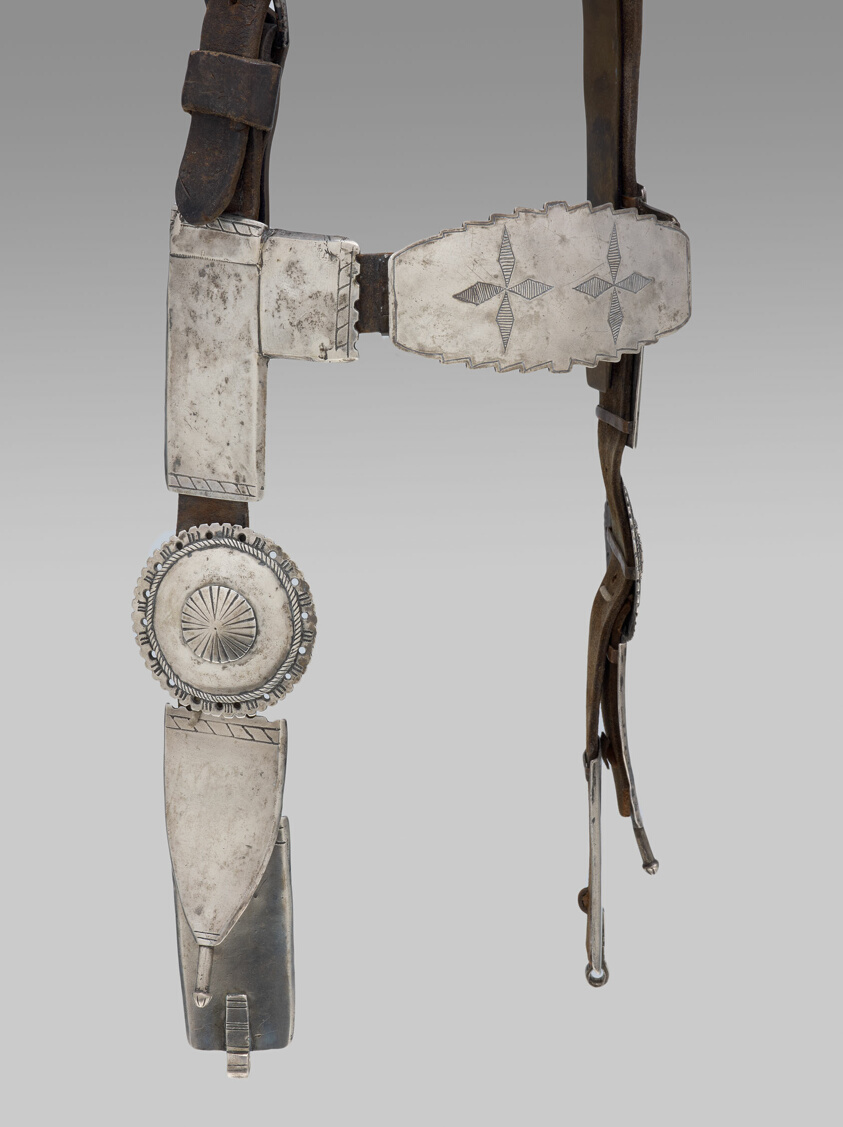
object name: Costume and Accessories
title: Horse Headstall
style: navajo, dine, americas, native american, native north american, Arts of the Americas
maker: Navajo (Diné) (Northern New Mexico or Arizona, United States)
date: 1870s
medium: Silver and leather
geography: New Mexico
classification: headpiece (animal equipment); american decorative arts; art of the americas; silver; decorative arts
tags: horse, ornaments, silver (color)